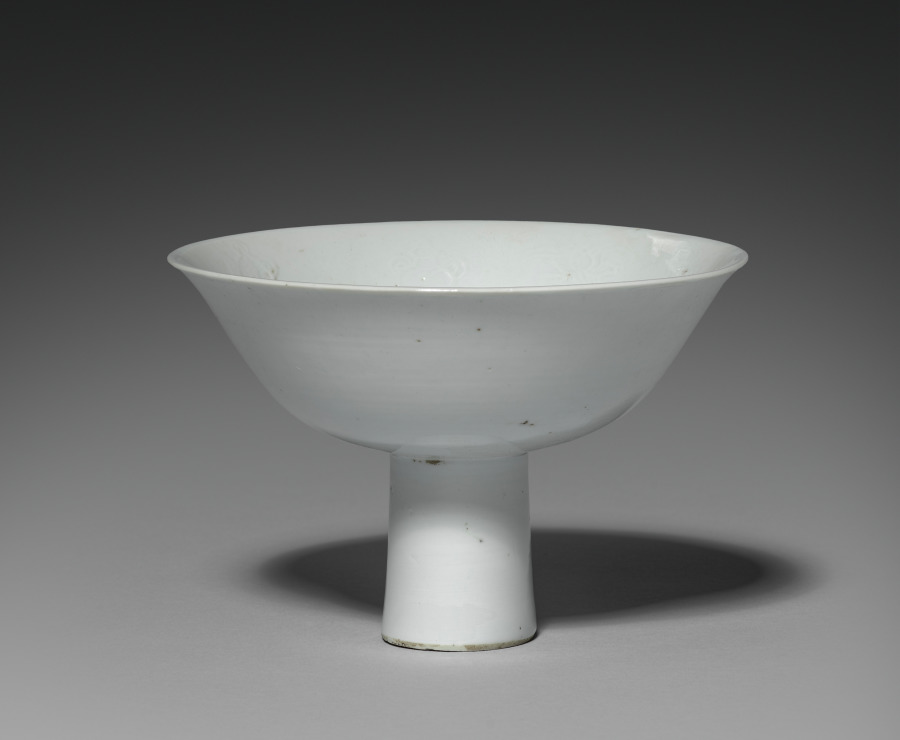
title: Stem Cup with Buddhist Emblems: Shufu Ware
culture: China, Jiangxi province, Yuan dynasty (1271-1368)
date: 1300s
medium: porcelain with molded decoration and white glaze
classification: Ceramic